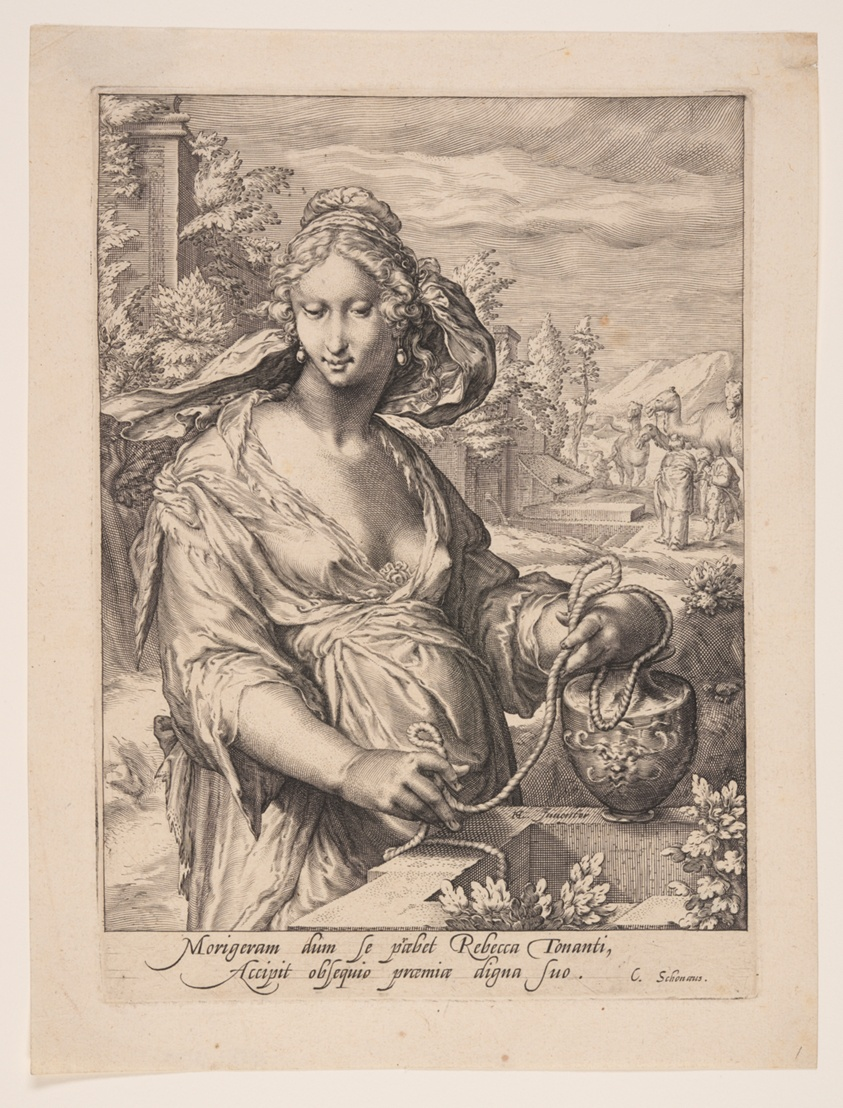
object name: Print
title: Rebecca, from The Wives of the Patriarchs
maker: Jacob Matham (Dutch, 1571–1631); after Hendrick Goltzius (Dutch, 1558–1617)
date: 1597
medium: Engraving on laid paper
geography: Netherlands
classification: print; engraving; paper; prints and drawing